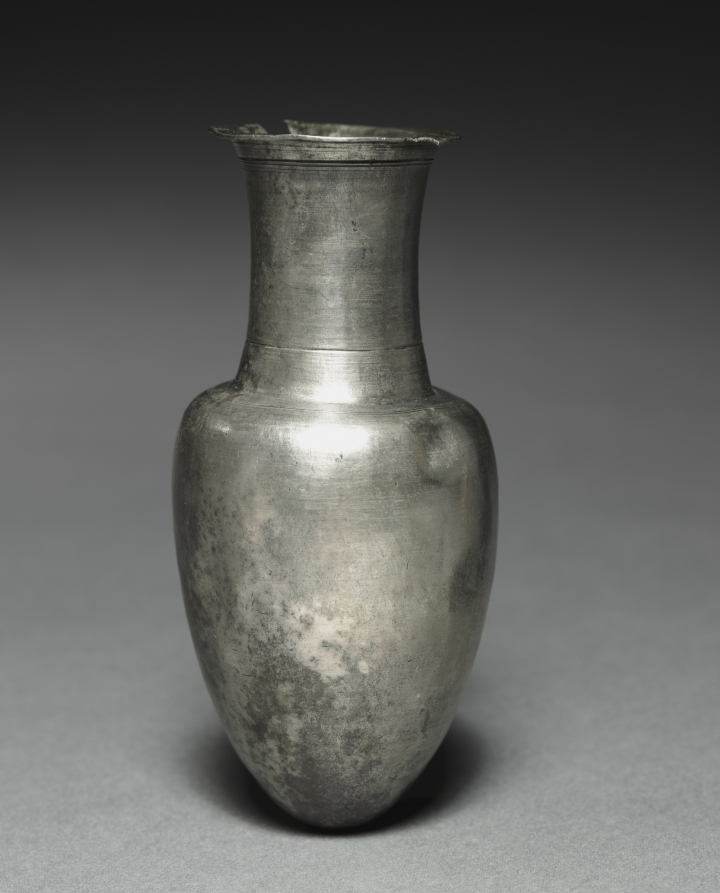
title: Amphoriskos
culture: Greece, late Hellenistic period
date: 200–1 BCE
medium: silver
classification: Metalwork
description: Though now missing both of its original handles, this silver vessel is a miniature version of an amphora, known in Greek as an amphoriskos. Such miniature vessels, made from silver or other materials, were used from the 6th century BCE onwards to store perfumes or scented oils.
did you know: This amphoriskos is made of a single sheet of raised silver.